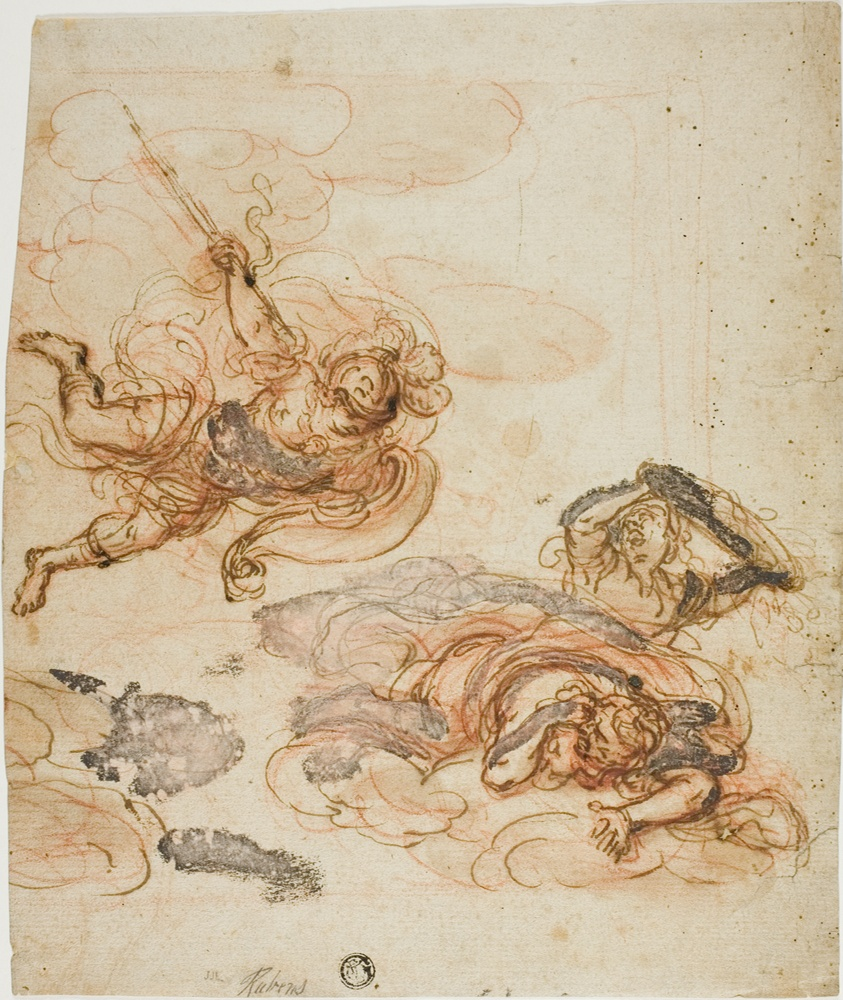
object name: Drawing and Watercolor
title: Mercury Chasing Two Harpies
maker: Peter Paul Rubens; Flemish, 1577-1640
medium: Pen and iron gall ink, with brush and brown wash, heightened with lead white (discolored), over red chalk, on cream laid paper, laid down on thin tissue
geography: Flanders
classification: pen and ink drawings; drawings (visual works); prints and drawing